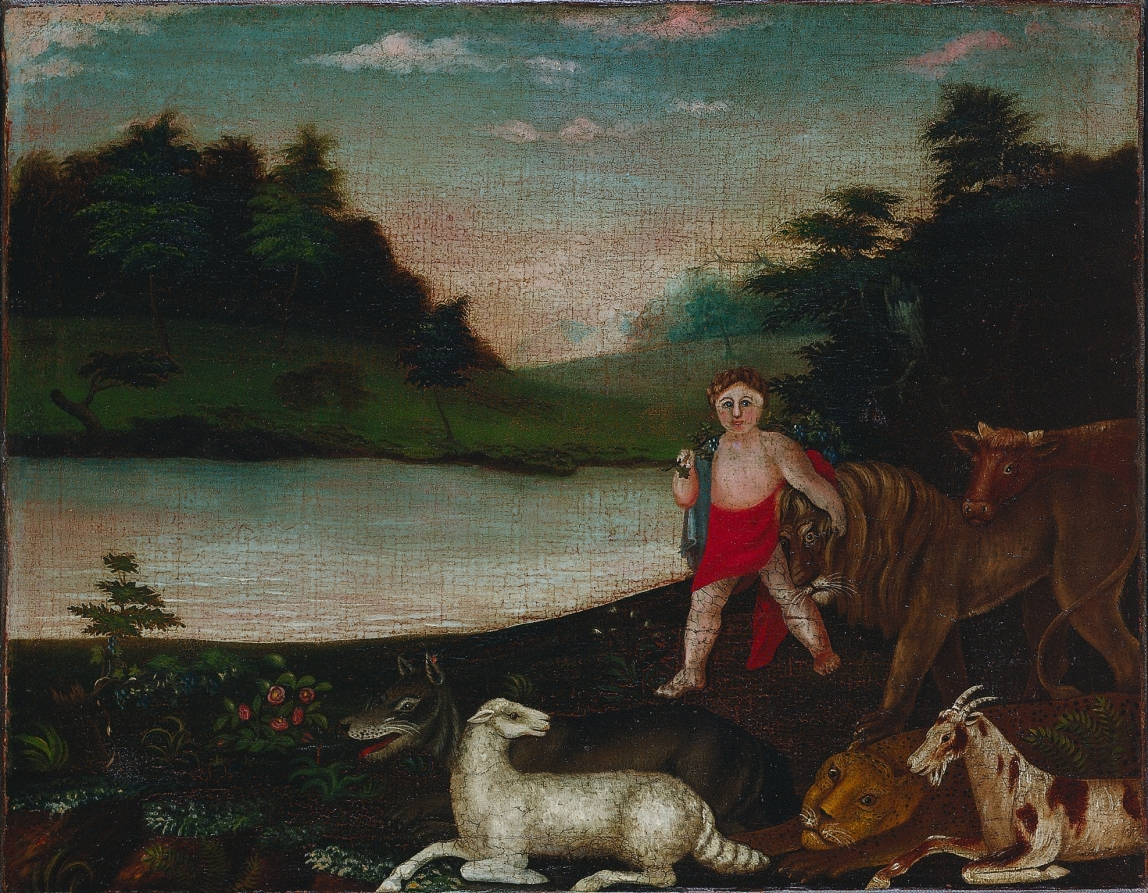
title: The Peaceable Kingdom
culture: America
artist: Edward Hicks (American, 1780–1849)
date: c. 1816–18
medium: oil on canvas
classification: Painting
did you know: Hicks painted more than 60 versions of the Peaceable Kingdom, and this example is likely the first.